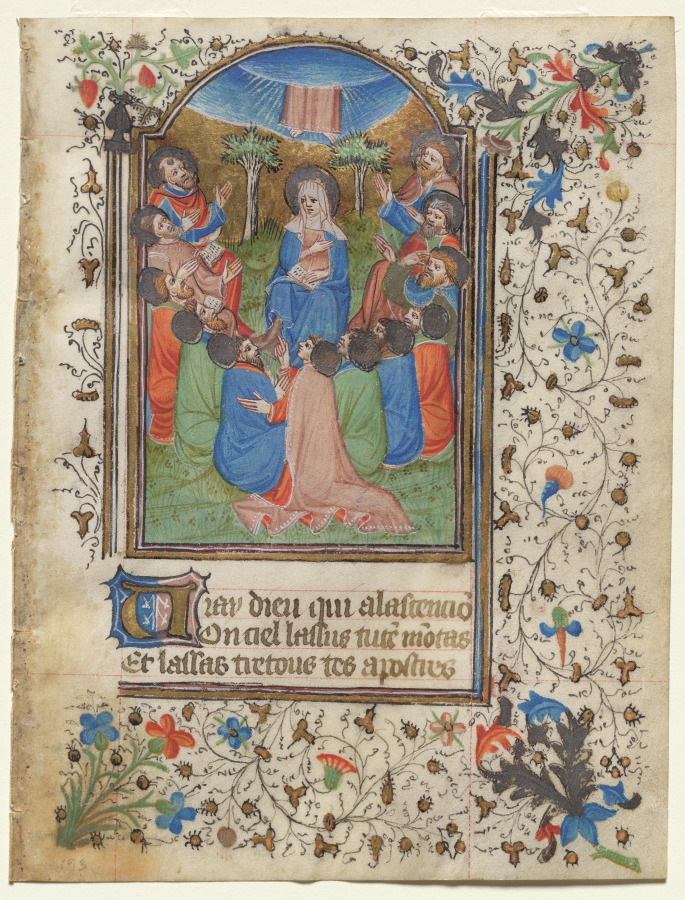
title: The Ascension: Leaf from a Book of Hours (4 of 6 Excised Leaves)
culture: France, Metz, 15th century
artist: Henri d'Orquevaulx (French)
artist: or Workshop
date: c. 1420–30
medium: ink, tempera, silver, and gold on vellum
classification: Manuscript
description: This leaf survives from what must have been an extraordinarily rich book of hours. The elaborate Passion cycle and Suffrages point to an important patron. Internal evidence within the original calendar and texts indicates that Metz was the probable place of production. Stylistically, the illuminations appear to come from the workshop of Henri d’Orquevaulx, a documented Metz manuscript painter. Compositionally, structurally, and stylistically, the miniatures suggest strong links to Netherlandish illumination. It is not known whether d’Orquevaulx came originally from the Netherlands or whether he simply worked or trained there at some point in his career.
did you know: Mostly used by women, books of hours are estimated to have been owned by every fourth household at the height of their popularity.